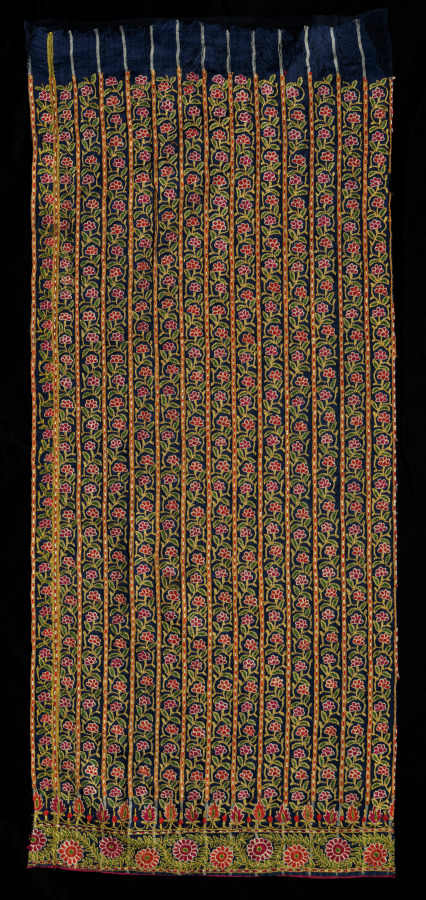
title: Part of a Skirt (Ghaghara)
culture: Western India, Gujarat, possibly Kutch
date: early 1800s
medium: silk satin embroidered with silk in "ari" chain stitch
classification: Embroidery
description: Brightly colored floral vine patterns were embroidered using fine chain stitches. Since there are continuous, unbroken lines of stitches on the back side of the cloth, they were created using a hooked awl, which is a much faster process than embroidering with a straight needle. This type of embroidery is known as ari work, which flourished in Gujarat during the 19th century.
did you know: The renowned art historian A. K. Coomaraswamy (1877–1947) gave another section of this skirt to the Victoria and Albert Museum in London, UK (IM.108-1912).